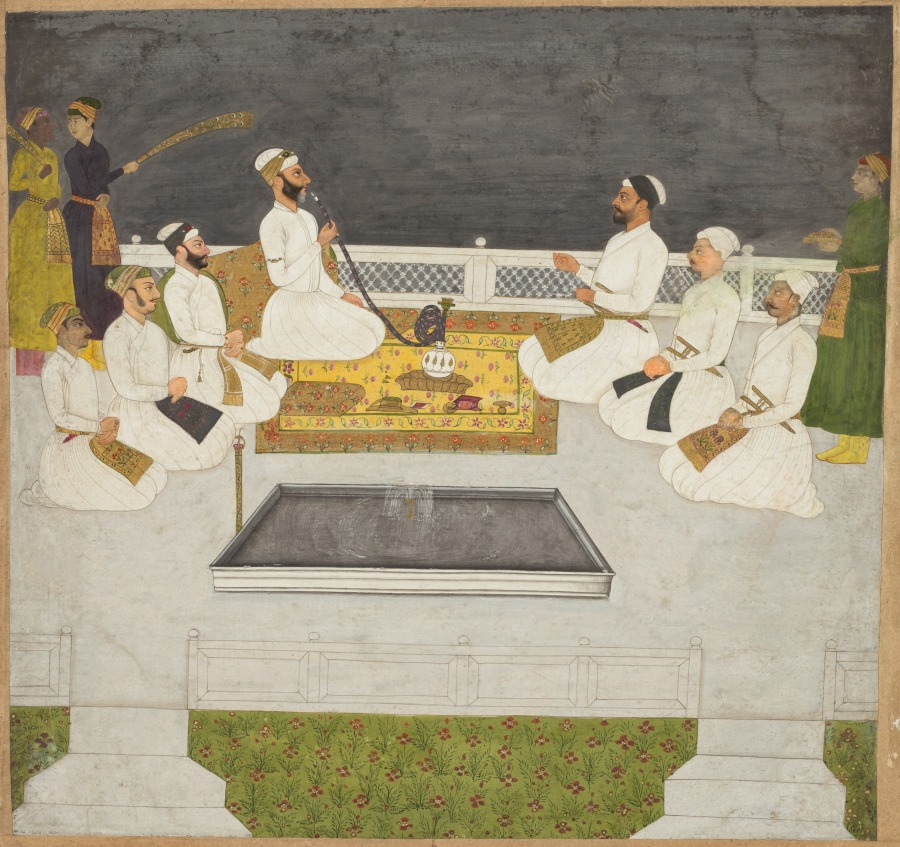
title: Husain Ali Khan Entertaining His Brothers (The Sayyid Brothers)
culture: India, Mughal Dynasty (1526-1756)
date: c. 1712–19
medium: Gum tempera, ink, and gold on paper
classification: Painting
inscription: Persian inscription at bottom, in nasta‘liq script: Portraits of Nawab Husayn-Ali Khan and Abdullah Khan and Najm al-Din Ali Khan and Fakhr al-Din Ali Khan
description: The shrewd imperial oligarch smoking the hookah and his brothers ran the Mughal government after the death of Emperor Alamgir in 1707 until the rise of Emperor Muhammad Shah in 1719. They were ruthless, self-serving kingmakers who caused the assassinations and accessions of six different members of the royal family to the Mughal throne in Delhi. The two attendants behind him exchange a worried glance, and the rare use of a flat gray sky behind the white marble terrace suggests the artist’s mood about the future strength and prosperity of the empire.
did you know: The man shown smoking a hookah is the Mughal imperial ruler.